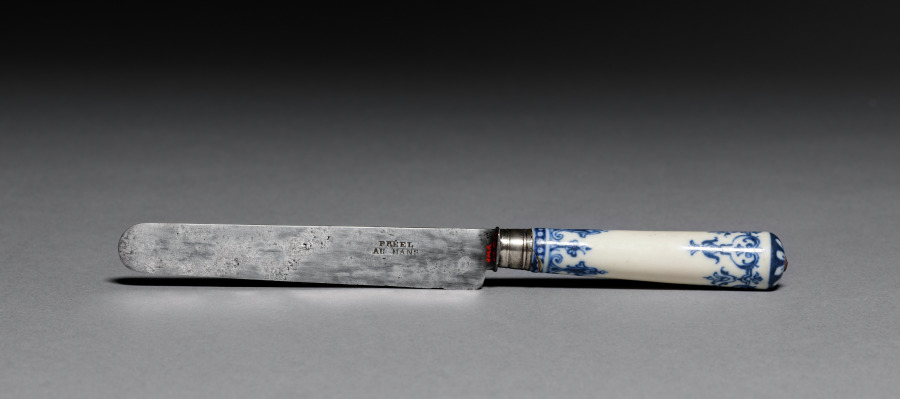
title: Knife Handle (manche de couteau)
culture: France, Saint Cloud, early 18th Century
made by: Saint Cloud Porcelain Factory (French)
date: c. 1710–1730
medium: soft-paste porcelain, steel blade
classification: Ceramic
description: Prior to the 18th century, personal flatware was produced in expensive materials as a luxury item that communicated wealth and status. Porcelain handles were introduced at the beginning of the 18th century, likely by the Saint-Cloud factory. This handle is decorated with a pattern in underglaze blue inspired by porcelain imported from China and has been fitted to a steel blade.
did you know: The Saint-Cloud porcelain factory was the first successful European manufacturer of soft-paste porcelain, a slightly off-white product that attempted to emulate the prized hard-paste porcelain produced by China and Japan.